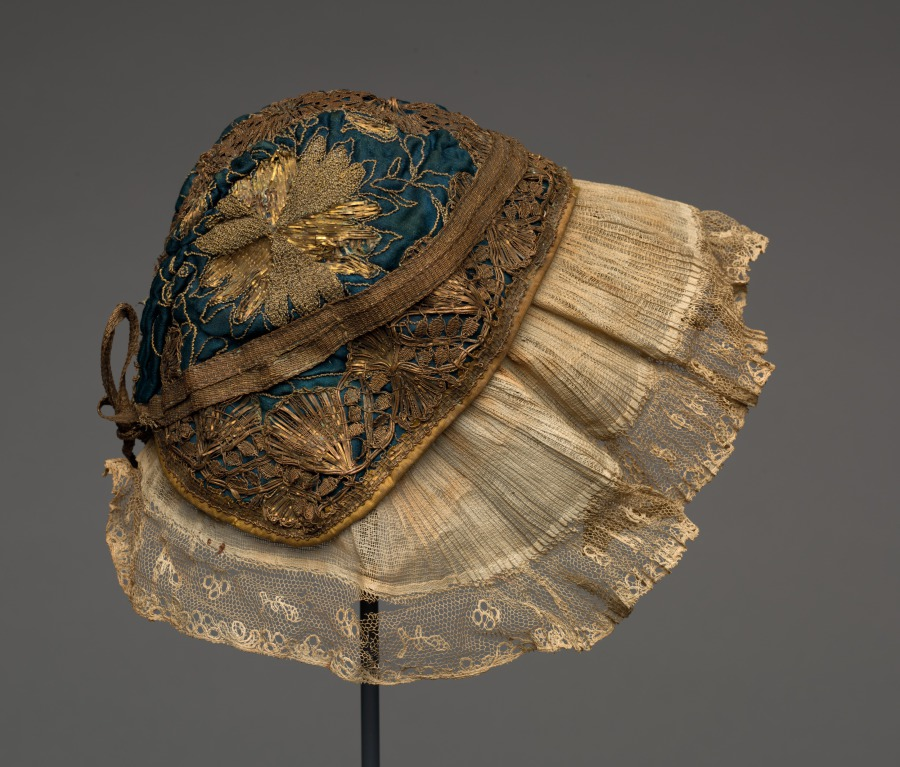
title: Embroidered Cap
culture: Germany, Mecklenburg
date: 1700s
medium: embroidery; satin ground embroidered with gold thread and decorated with gold lace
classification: Garment